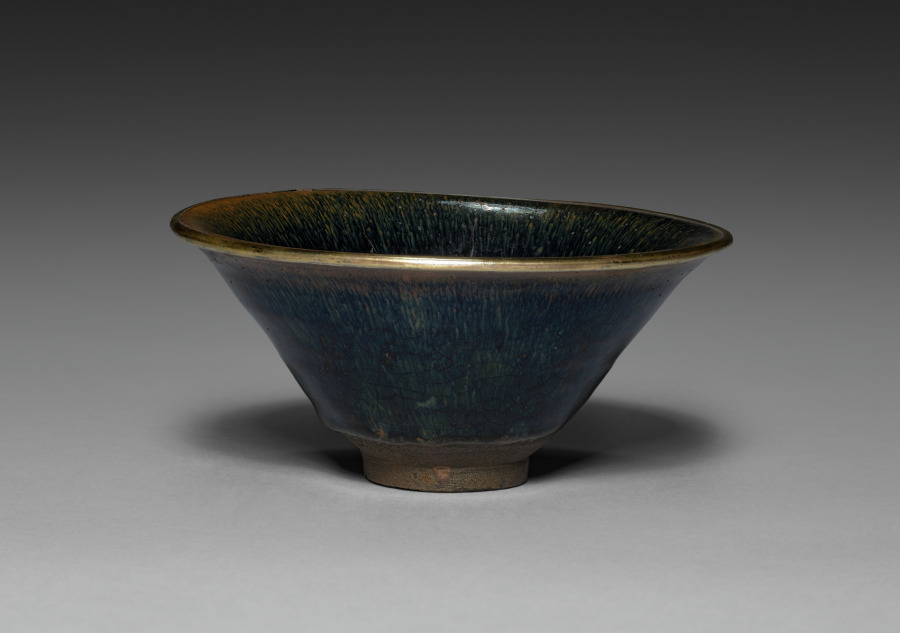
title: Tea Bowl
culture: China, Fujian province, Southern Song dynasty (1127-1279)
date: 1100s–1200s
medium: Stoneware with black “hare’s fur” glaze and metal-bound rim, Jian ware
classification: Ceramic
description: Due to its exceptional size, this Fujian tea bowl is rather rare. The enjoyment of Jian ware rests with the glaze transmutation due to iron in the glaze, which developed into reddish-brown streaks and spots against a rich black glaze after firing. Connoisseurs called these iron formations "hare’s fur" marks, and the ware was very popular with the tea cultures in China and Japan.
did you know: The reddish-brown streaks and spots have been affectionately termed "hare's fur" among connoisseurs.